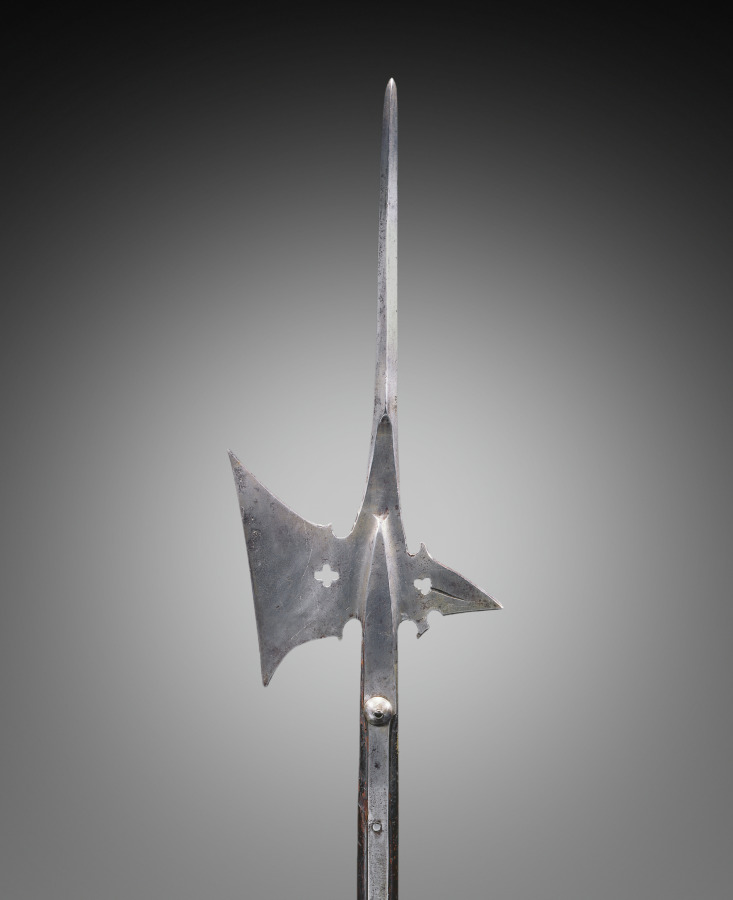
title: Halberd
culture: Germany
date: c. 1520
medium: steel, pierced quatrefoil; rectangular wood haft with planed corners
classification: Arms and Armor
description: The halberd was a staff weapon favored by European infantries (foot soldiers) of the 1400s and 1500s for its versatility and deadly effect. The word halberd comes from the German words Halm (staff) and Barte (axe). The halberd is, in fact, an axe that served multiple functions: the axe blade was used for hacking, the spike for thrusting, and the beak for piercing plate armor or for pulling a knight from his saddle. The halberd was used by shock troops (those who lead an attack) and by Swiss and German mercenaries. After about 1550, the halberd gradually became less functional. Its large blade provided space for coats of arms and insignia. By the late 1500s, the parade halberd had become a ceremonial weapon for palace guards.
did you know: A halberd requires the use of both hands and so a halberdier cannot carry a shield for protection.